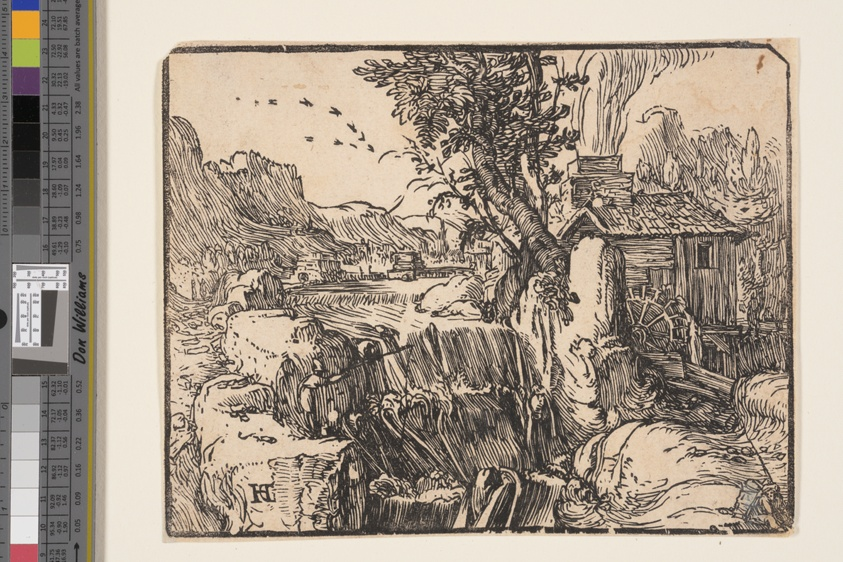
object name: Print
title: Landscape with a Waterfall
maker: Hendrick Goltzius (Dutch, 1558–1617)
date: c. 1600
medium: Woodcut printed in black on cream laid paper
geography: Netherlands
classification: woodcut; paper; print; prints and drawing